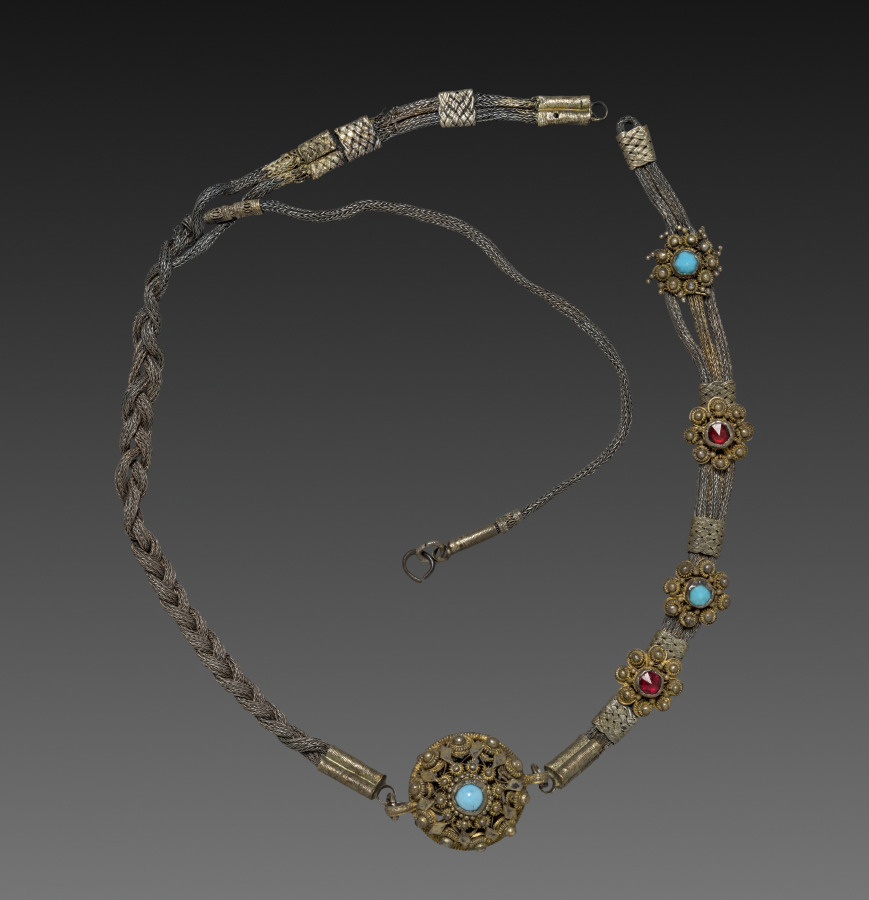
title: Man's Silver Chain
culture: Yugoslavia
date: 1800s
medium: silver and glass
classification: Jewelry